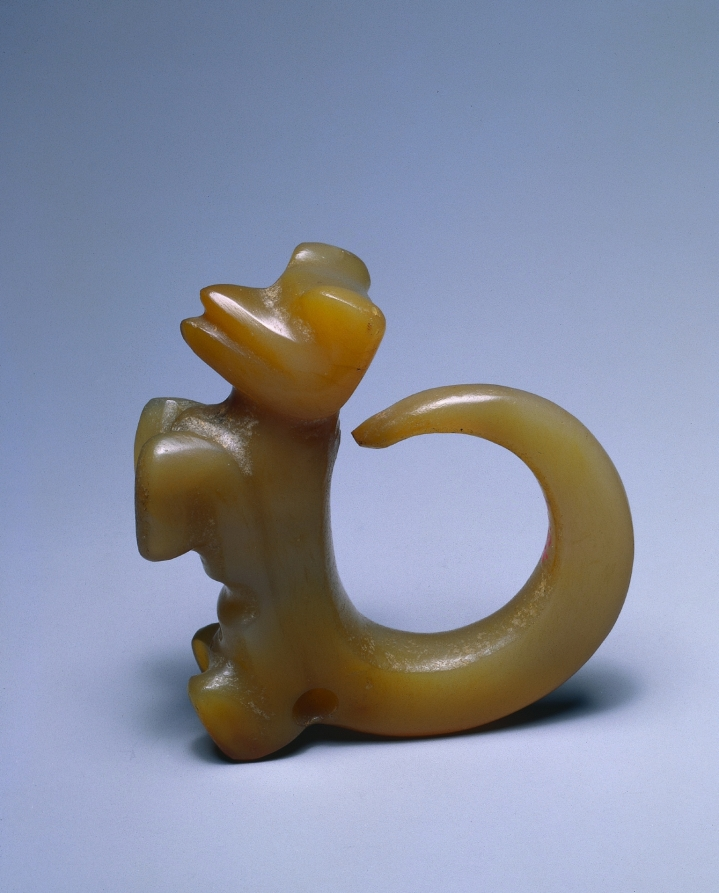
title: Curly-Tailed Animal Pendant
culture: Panama, Initial style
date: 100–800 CE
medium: agate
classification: Sculpture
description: A favored Initial-style subject is a charming animal whose curly tail-its most impressive feature-may derive from a monkey's. Its other traits vary considerably, causing it to be identified as everything from a dog to a duck. Initial-style gold ornaments represent Panama's oldest metalwork. Since metal technologies appeared suddenly and fully developed in Panama, it is likely that they were introduced from the outside, probably from Colombia to the south.